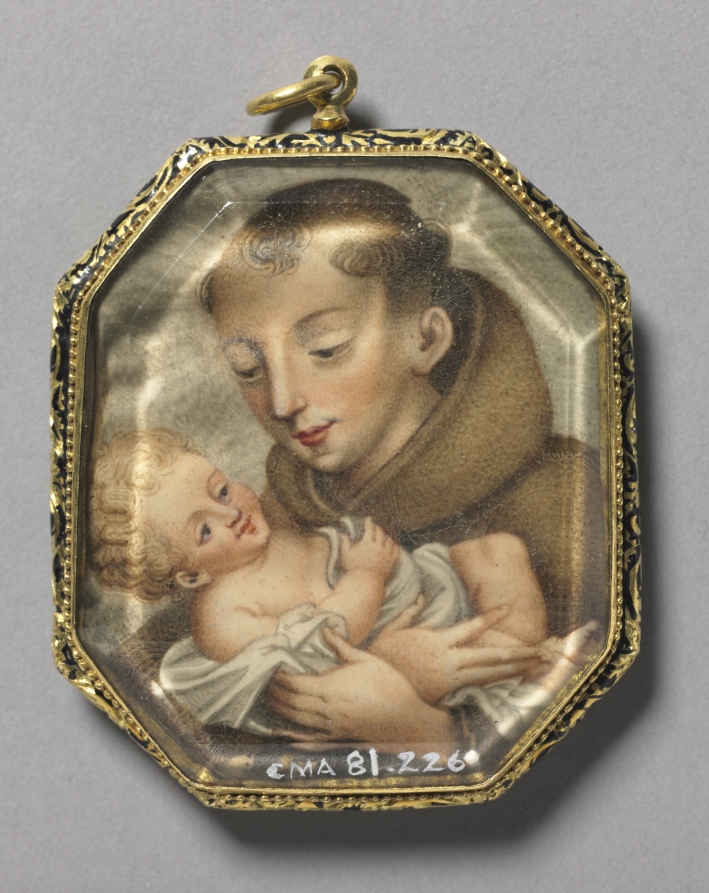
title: St. Francis with Christ Child (verso)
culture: Spain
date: c. 1660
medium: watercolor on vellum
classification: Portrait Miniature